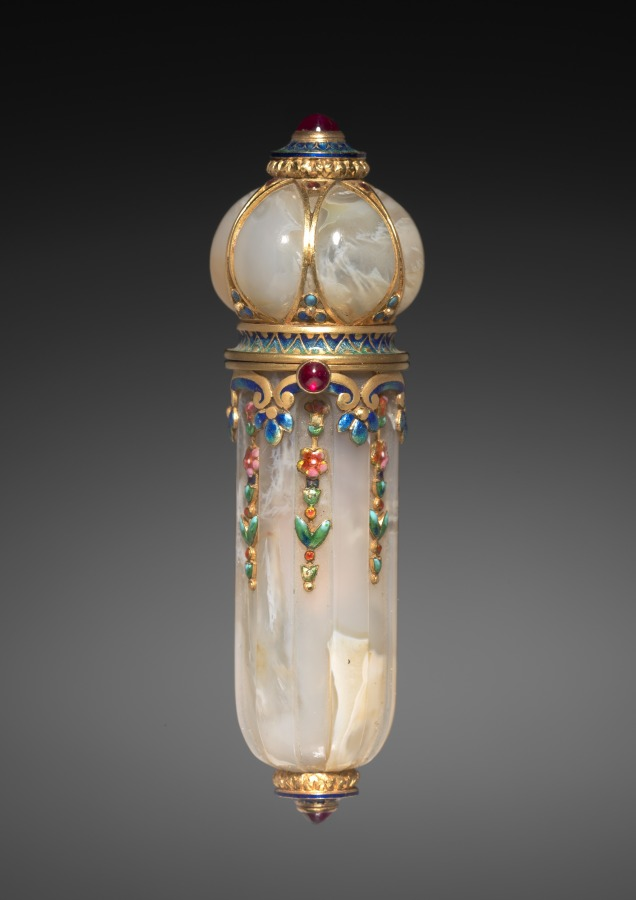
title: Perfume Vial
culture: France, Paris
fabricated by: Tecla Firm (French)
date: c. 1900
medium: agate with enamel, gold, rubies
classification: Miscellaneous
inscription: "Tiffany & Co." engraved at edge of top.